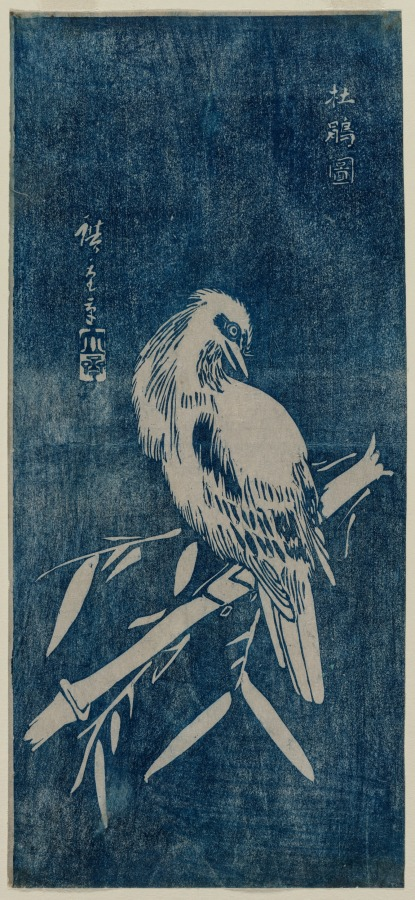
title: Cuckoo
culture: Japan, Edo period (1615–1868)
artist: Utagawa Hiroshige (Japanese, 1797–1858)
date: 1840s or later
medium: color woodblock print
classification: Print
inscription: Signature: Hiroshige Artist Seal: Ryusai